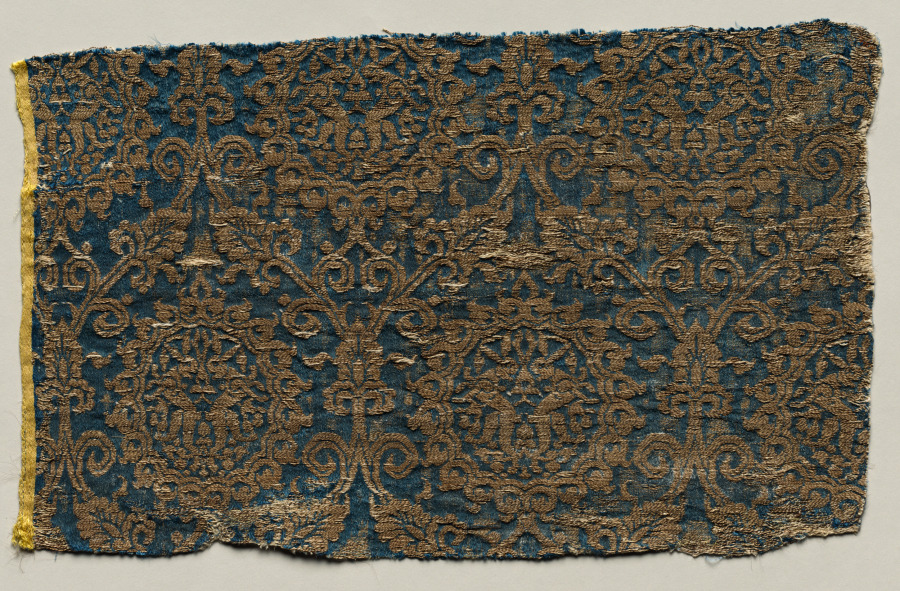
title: Lampas with hares in ogival pattern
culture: probably Iran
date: 1300s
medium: lampas: silk and gold thread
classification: Textile